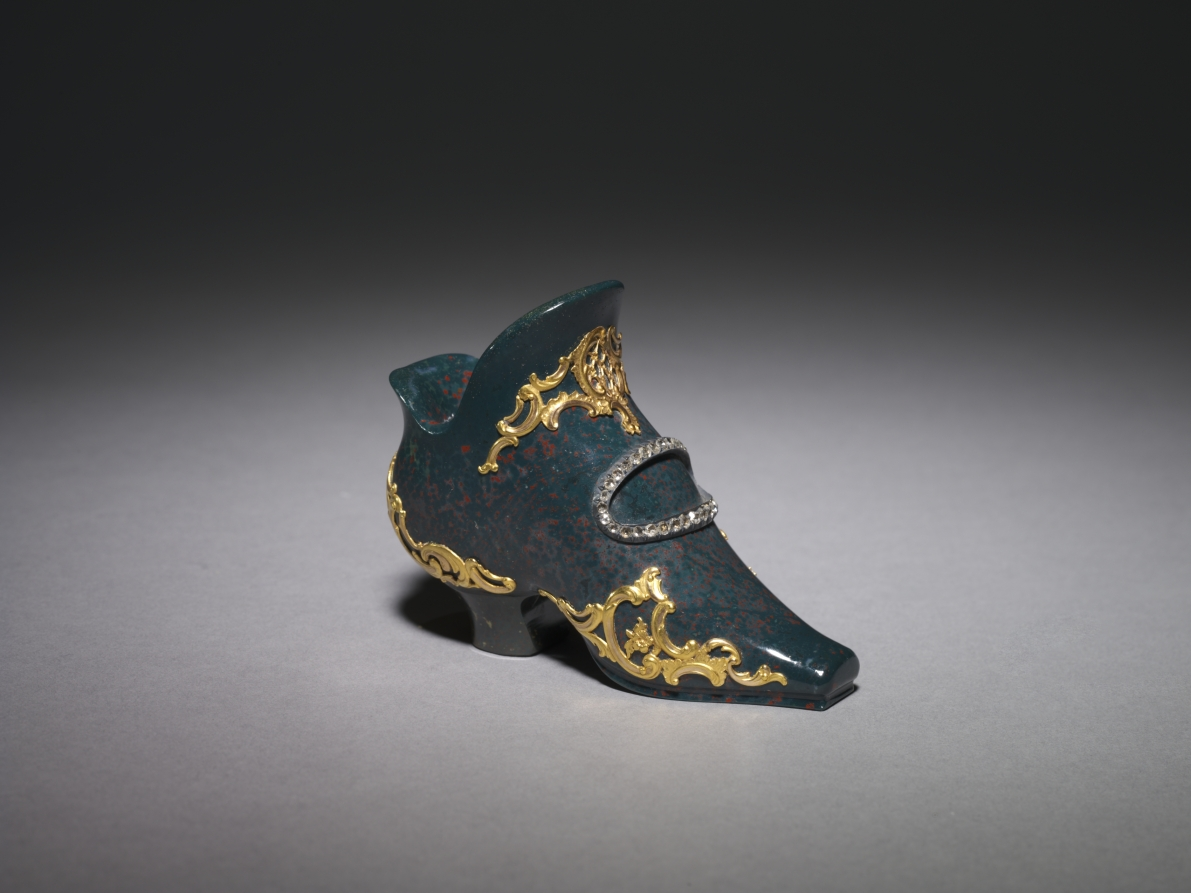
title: Miniature Shoe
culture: Russia, St. Petersburg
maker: House of Fabergé (Russian, 1842–1918)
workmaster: attributed to Mikhail Evlampievich Perkhin (Russian, 1860–1903)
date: c. 1895–1900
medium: bloodstone, gold, diamonds, silver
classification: Miscellaneous